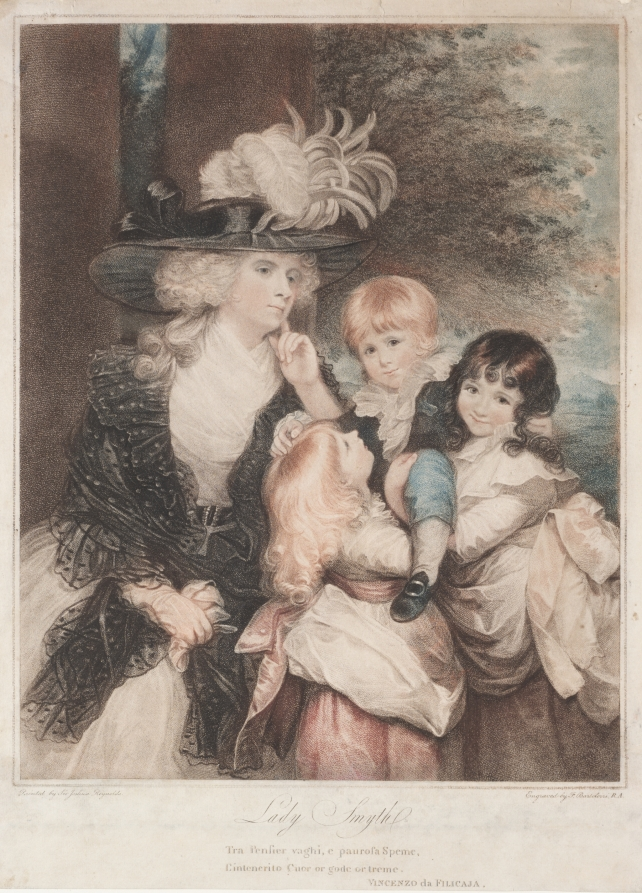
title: Lady Smith and Her Children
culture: England, 18th century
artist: Francesco Bartolozzi (British, 1727–1815)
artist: after Joshua Reynolds (British, 1723–1792)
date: 1789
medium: color stipple engraving and etching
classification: Print